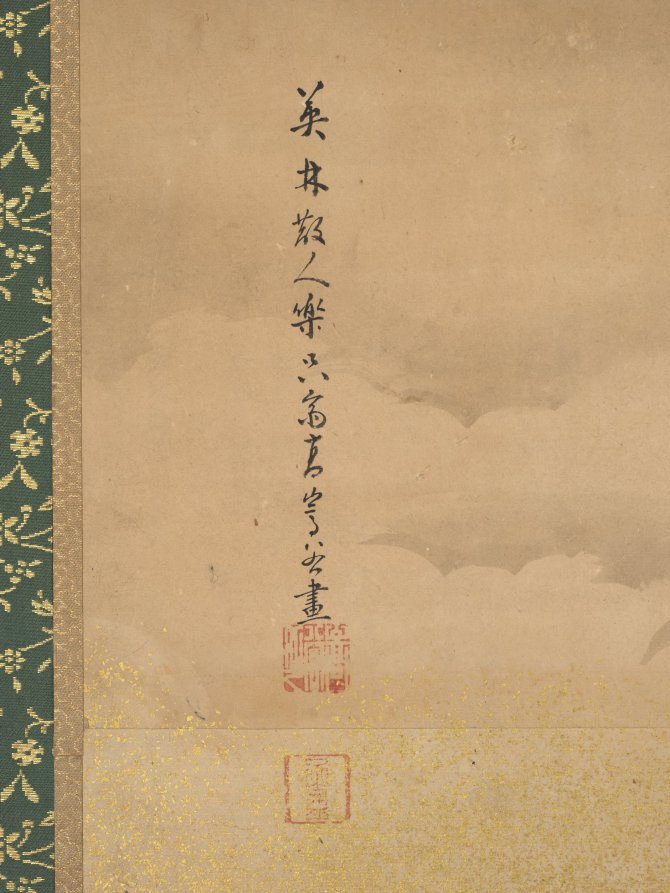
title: Spring and Autumn Farming (Autumn)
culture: Japan, Edo period (1615–1868)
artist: Kō Sūkoku (Japanese, 1730–1804)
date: 1700s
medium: Six-panel folding screen, ink, light color, gold, and silver on paper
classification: Painting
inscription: Signature of the artist: "Enrin san jin Rakushisai ko Sukoku ga" (each screen)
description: These screens present the cycle of the farming year, starting with spring at right and ending with fall at left. Close examination of these screens reveals moments of games and amusement, the enjoyment of meals as well as intellectual and spiritual pursuits interspersed among the scenes of cultivating and preparing the rice harvest. The artist Kō Sūkoku is considered the 18th-century heir in style and attitude to Hanabusa Itchō (1652–1724). Itchō’s work incorporated elements from Kano school, ukiyo-e, and literati styles of painting. Kō trained with one of Hanabusa’s pupils, Sawaki Sūshi, who was best known for scenes depicting everyday life and customs.